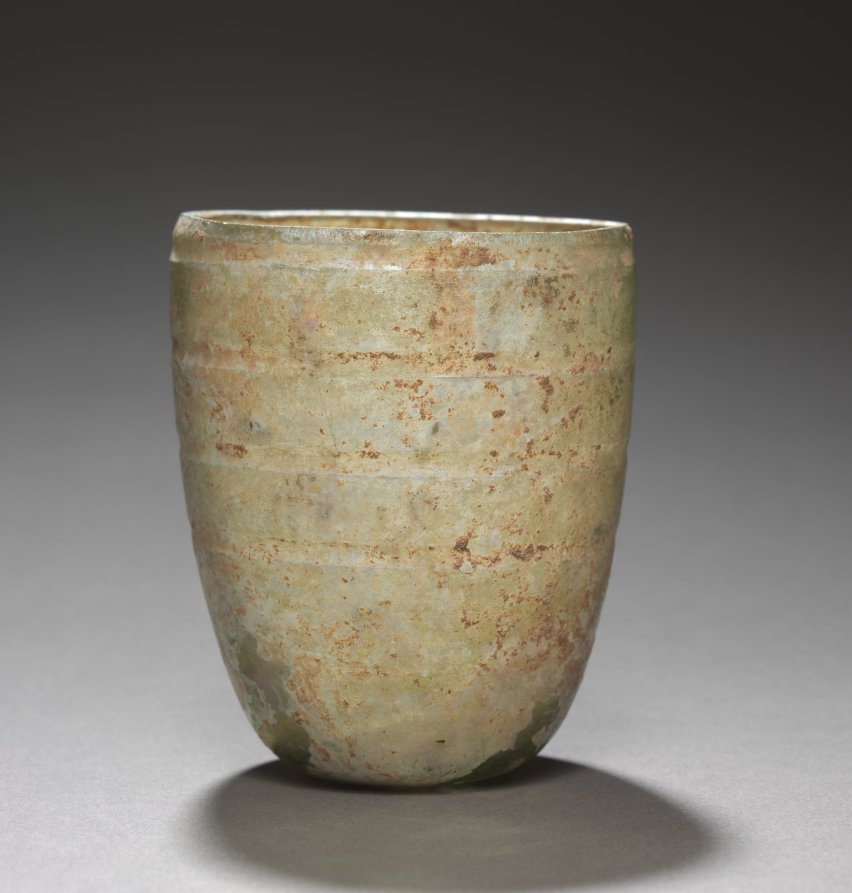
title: Cup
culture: Eastern Mediterranean, Roman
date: c. 300–400 CE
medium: glass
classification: Glass